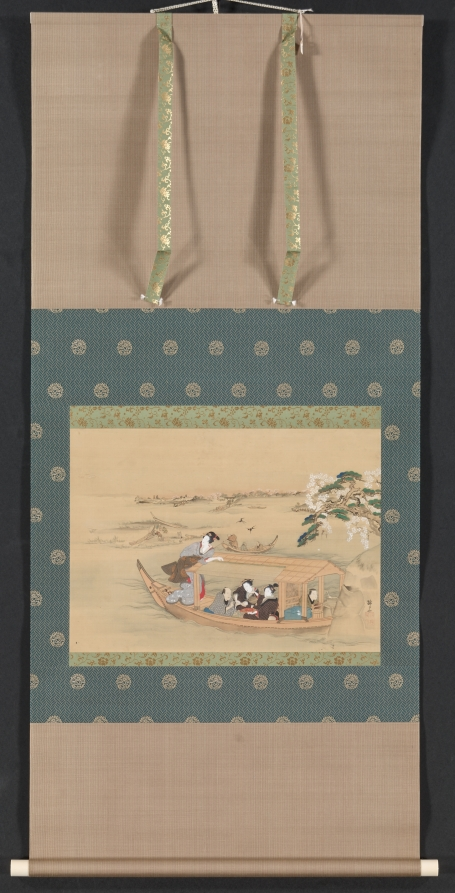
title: Pleasure Boat on the Sumida River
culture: Japan, Edo period (1615–1868)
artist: Teisai Hokuba (Japanese, 1771–1844)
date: 1800s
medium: Hanging scroll; ink and color on silk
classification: Painting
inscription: Signed: Teisai. Sealed: Teisai go [no] in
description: After a major fire in Edo (now Tokyo), the Yoshiwara licensed brothel district was relocated to an area accessed via boat along the Sumida River, giving rise to many compositions depicting travel there. Here, attendants with checkered robes serve refreshment to a client. A figure at the fore of the boat tends to the kitchen. A courtesan at the aft, or rear, surveys the river scene. Acquaintances converse in modest commuter boats, and fishers put in to a tiny island. The boat is near the entrance to the San’ya Canal, where pleasure-seekers would disembark.